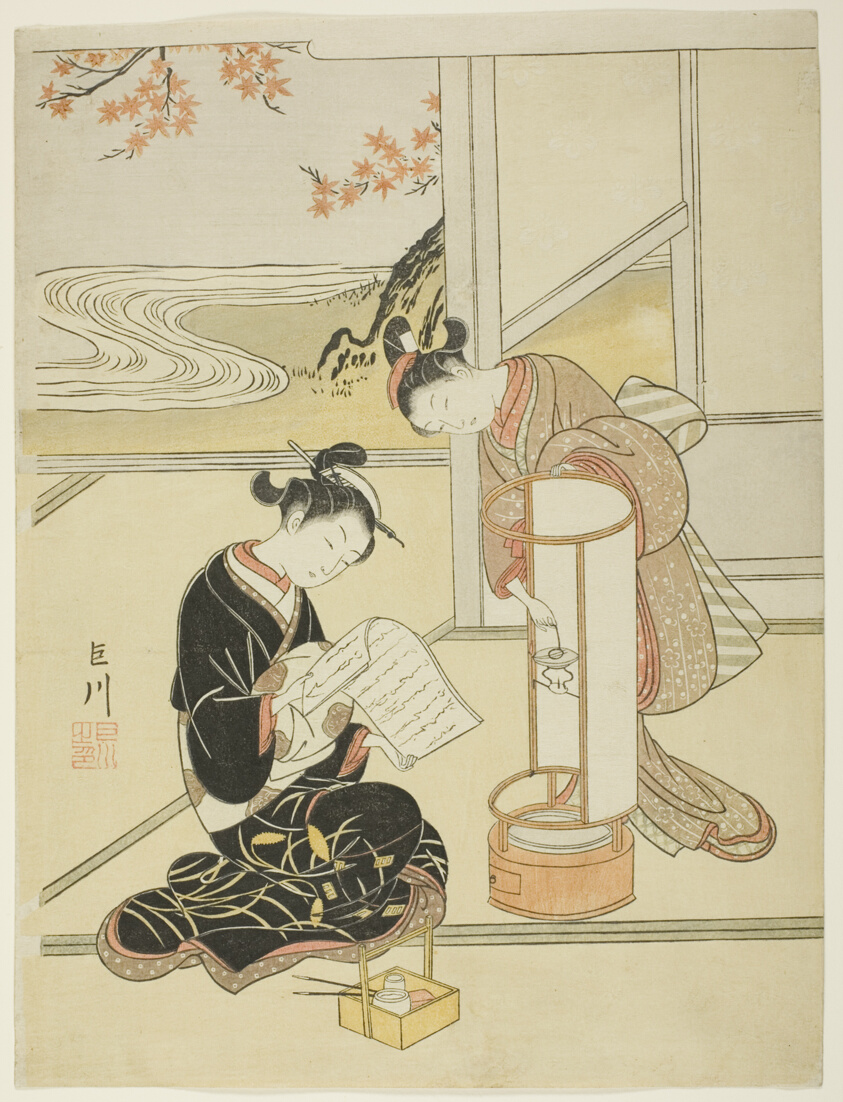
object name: Print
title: The Evening Glow of a Lamp (Andon no sekisho), from the series "Eight Views of the Parlor (Zashiki hakkei)"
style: Japanese (culture or style)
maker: Suzuki Harunobu 鈴木 春信; Japanese, 1725 (?)-1770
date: c. 1766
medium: Color woodblock print; chuban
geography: Japan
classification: woodblock print; print; asian art